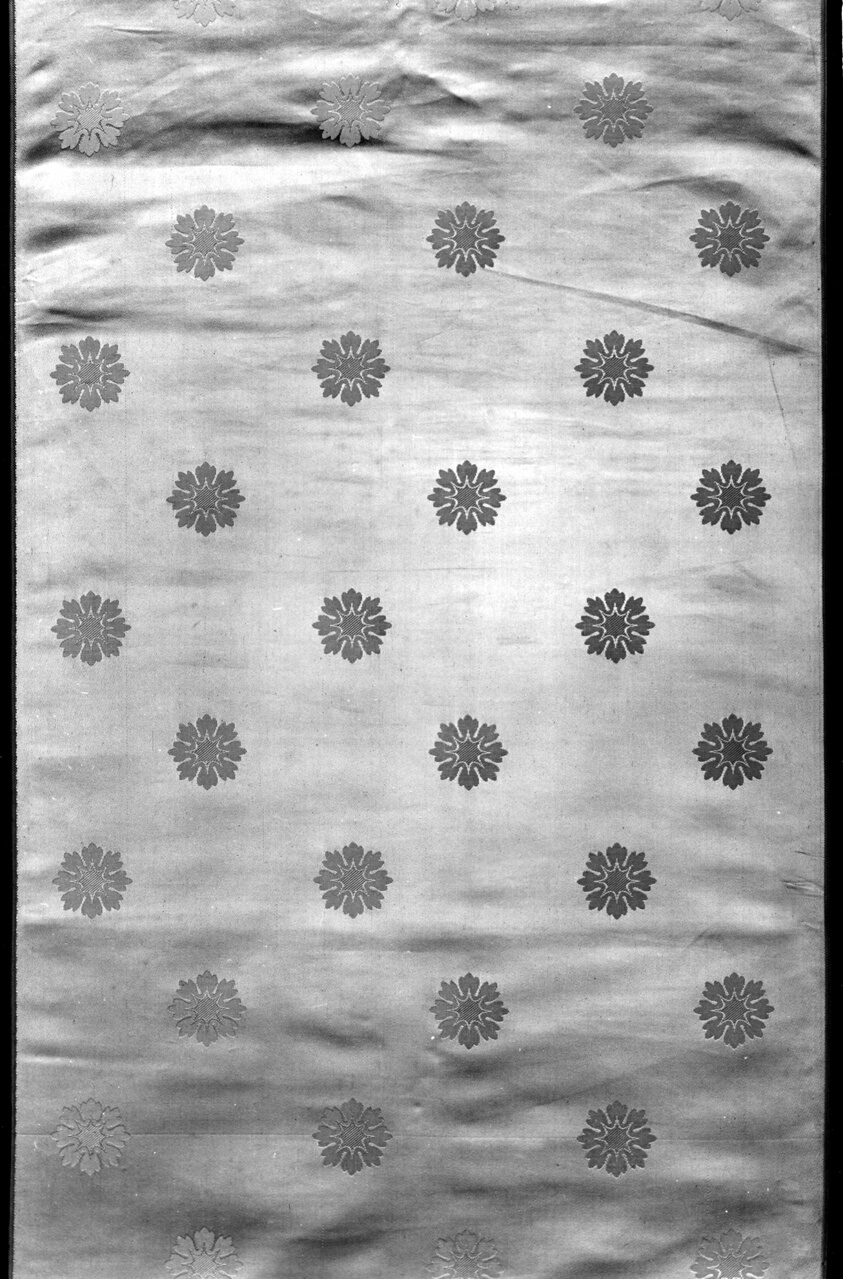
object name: Textile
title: Panel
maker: England or France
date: 1875/1900 (based on design from 1820s)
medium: Silk, warp-float faced 4:1 satin weave with supplementary patterning wefts tied by supplementary binding warps in weft-float faced 3:1 twill and plain interlacings; backed by plain weave of supplementary wefts tied by supplementary binding warps; Jacquard woven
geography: England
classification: textile; weaving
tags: flowers